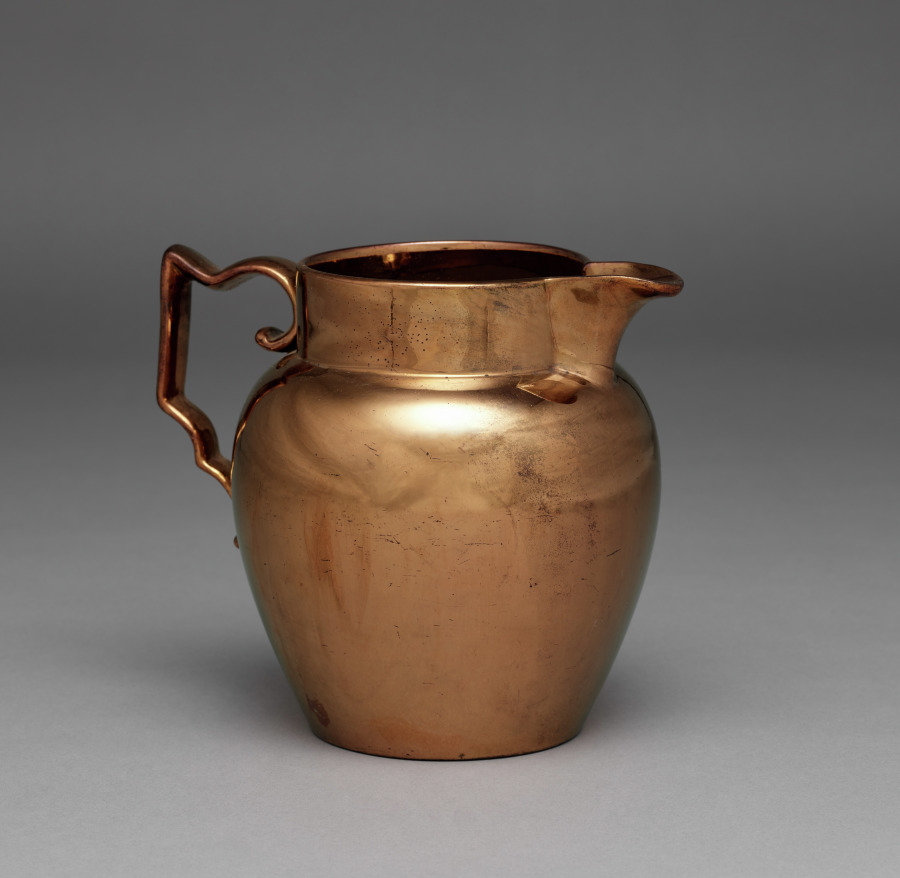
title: Copper-lustre Pitcher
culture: England, early 19th century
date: c. 1812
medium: ceramic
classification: Ceramic